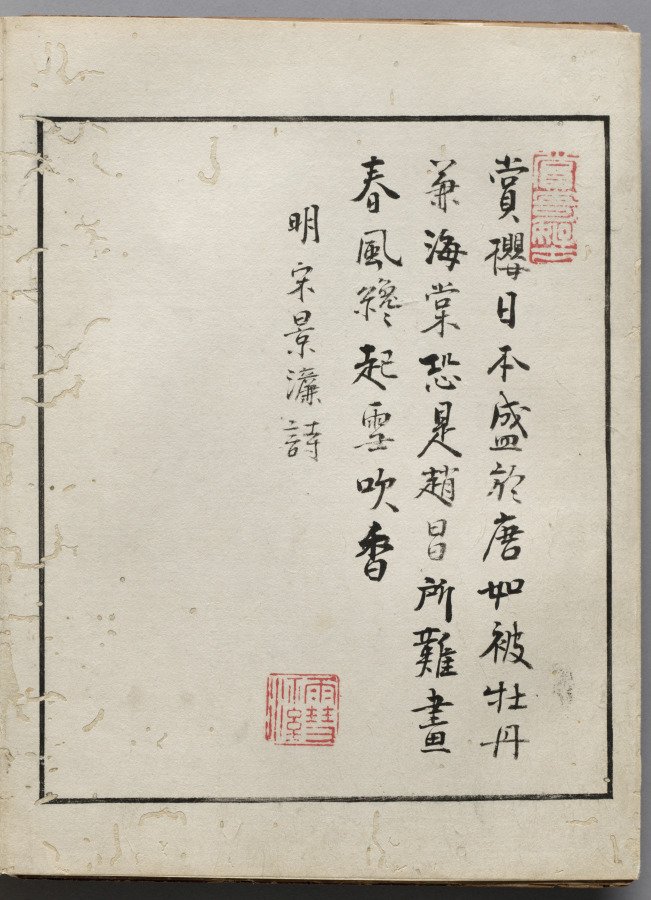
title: Double-Leaf from Album of Actor Portraits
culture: Japan, Edo period (1615–1868)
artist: Shōrakusai (Japanese)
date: c. 1790–1810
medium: double-leaf from accordion-style album; ink on paper (right) and and ink and color on silk (left)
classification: Bound Volume